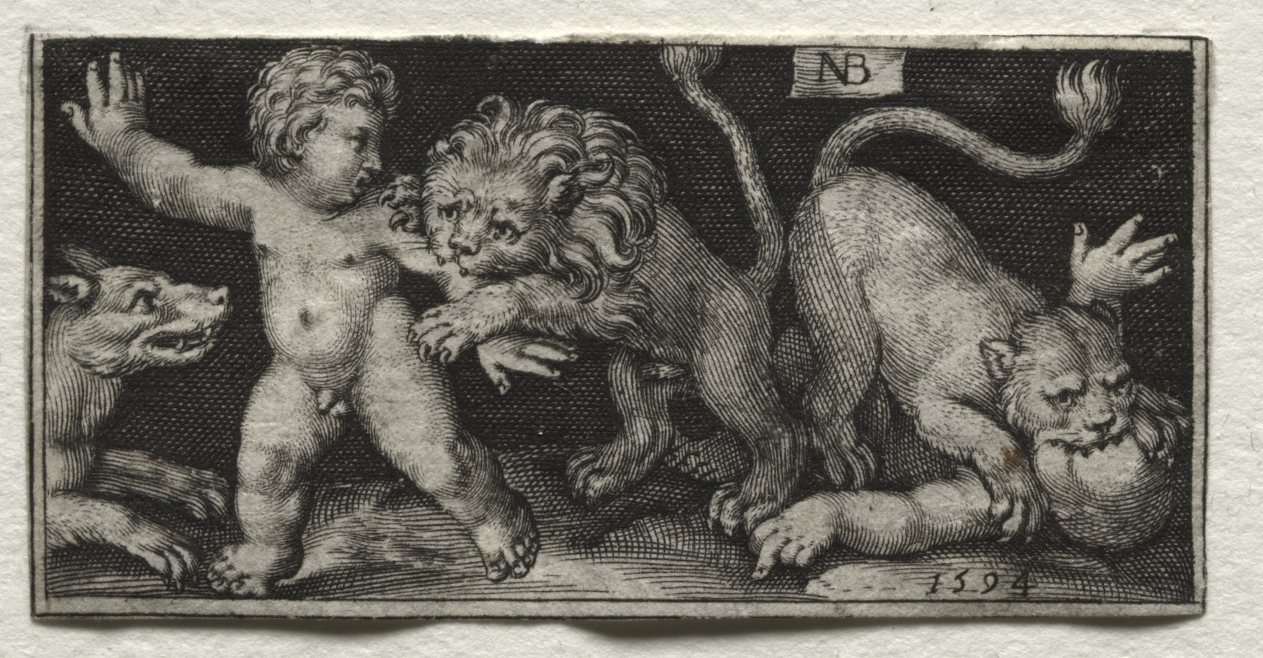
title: Lions Attacking Children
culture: Netherlands, 16th century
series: Fighting Chimeras and Scenes to Aesop's Fables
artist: Nicolaes de Bruyn (Netherlandish, 1571–1656)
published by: A. van Londerseel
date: 1594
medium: engraving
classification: Print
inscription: upper right, in plate: NB[in monogram] ; lower right, in plate: 1594 ; VERSO, lower left, in graphite: 76[upsidedown] ; lower left, in graphite: B4241 ; lower center, in graphite: 9[circled] FPO ; lower right, in graphite: 6264/130